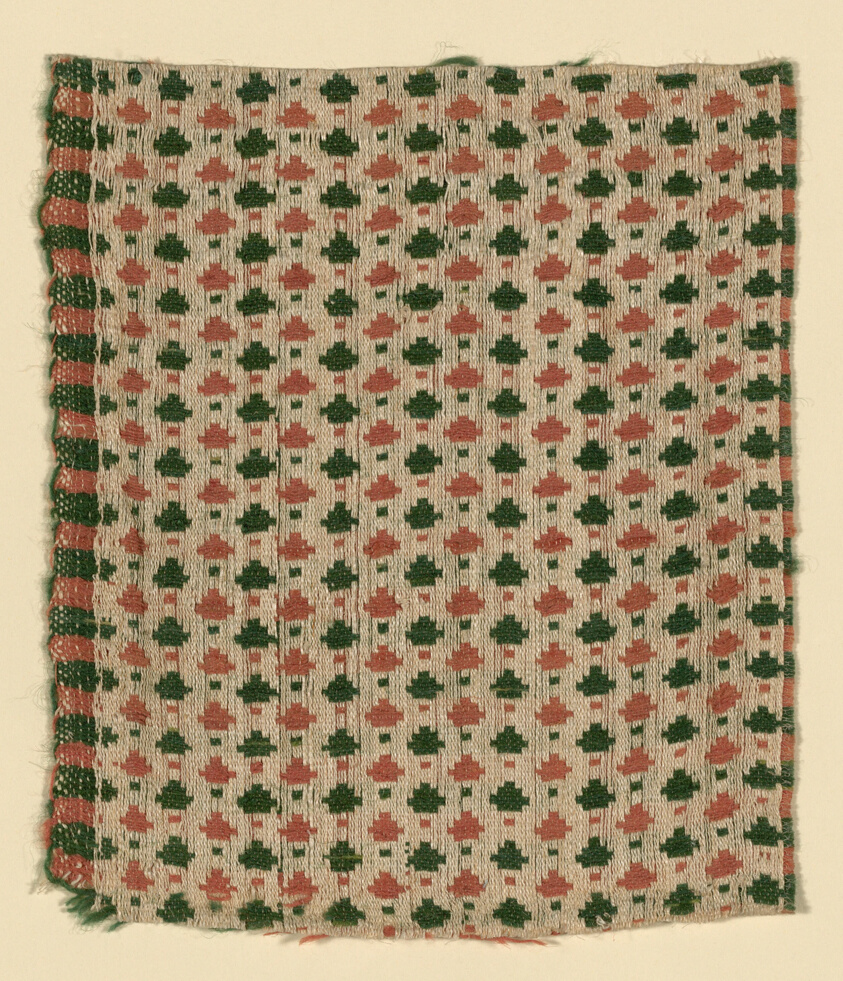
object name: Textile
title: Fragment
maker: Netherlands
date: 1601/25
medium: Linen and wool, plain weave, tied and free double cloth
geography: Netherlands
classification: textile; weaving